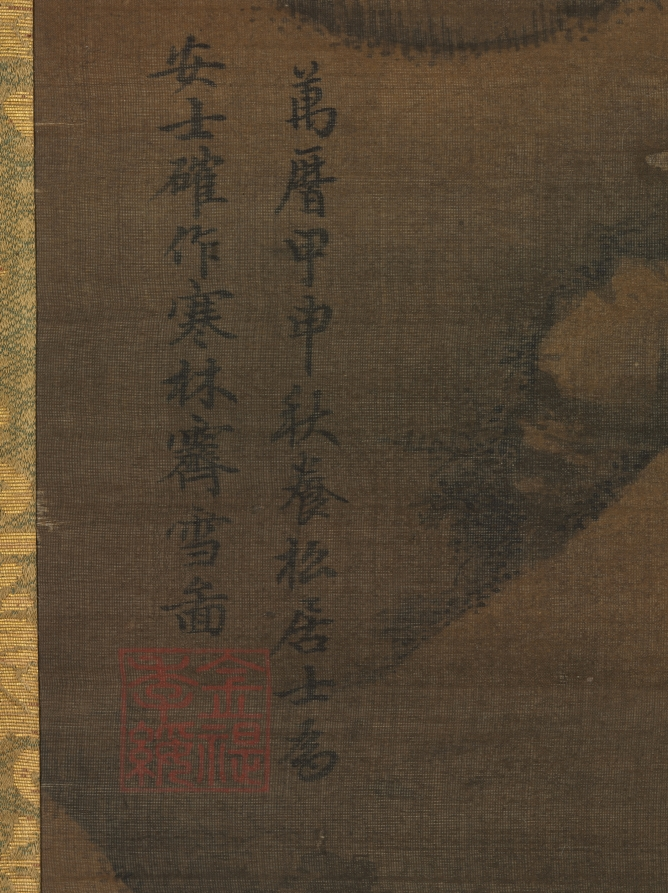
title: Snowscape with Figures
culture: Korea, Joseon dynasty (1392–1910)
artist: Kim Si (Korean, 1524–1593)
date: 1584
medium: hanging scroll; ink on silk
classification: Painting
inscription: The inscription (款識) on the upper left corner reads as following: 萬曆甲申秋養松居士爲安士確作寒林霽雪圖. The painter's seal (朱文方印) printed reads as following: 金禔季綏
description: This hanging scroll is a rare surviving example of early Joseon period painting. The painter Kim Si (1481–1537) was a member of the aristocracy, or high-ranking men. However, after his father, Kim Anro (1481–1537) fell out of power, Kim Si retreated himself and spent his life as a reclusive artist. In such a context, this image of a solitary scholar in his studio surrounded by trees and snow-covered mountains does not simply render an idealized life of a recluse focusing on scholarly pursuits; rather, it is the painter’s mindscape, indicating that the glory of his family has become a forgotten part of his past.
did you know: Having retreated to the snow-covered mountains, a scholar sits in his studio surrounded by trees. An empty wooden bridge in the distance appears to be longing for friends from afar. Such iconography often evokes the idea of an idealized recluse focusing on scholarly pursuits.